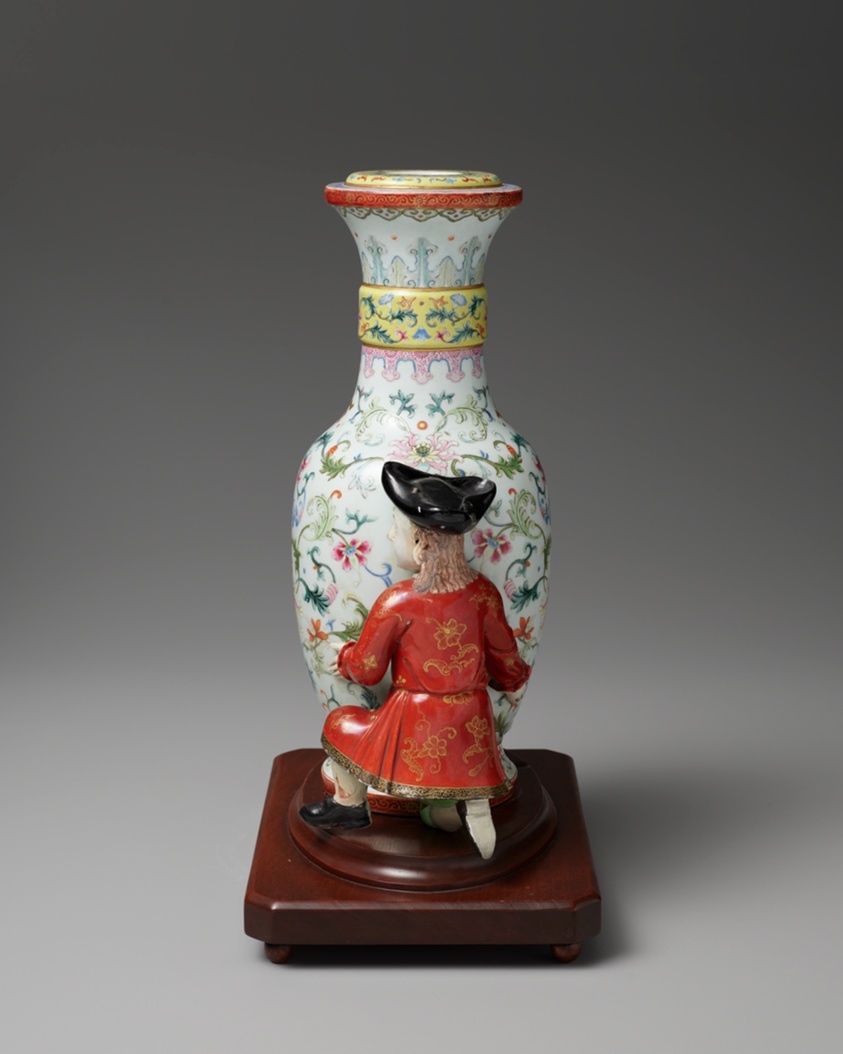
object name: Ceramics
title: Vase with European Figures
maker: China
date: second half of the 18th century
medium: Porcelain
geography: China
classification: vase; european decorative arts; porcelain